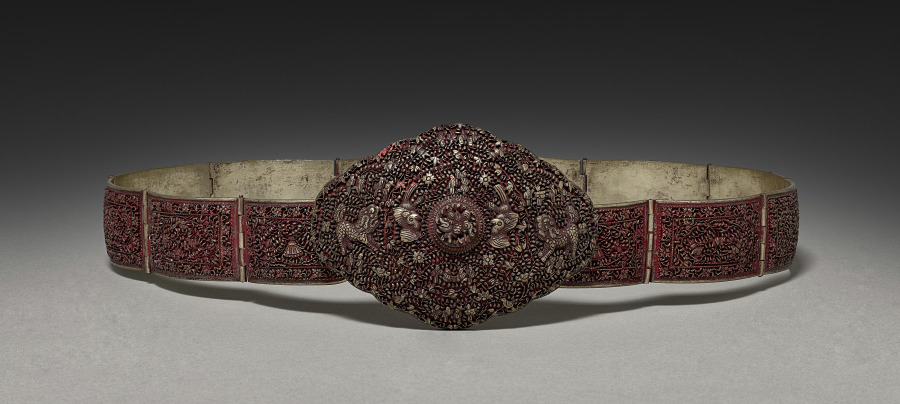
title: Belt with Buckle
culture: Siam, 19th century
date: 1800s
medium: brass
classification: Jewelry